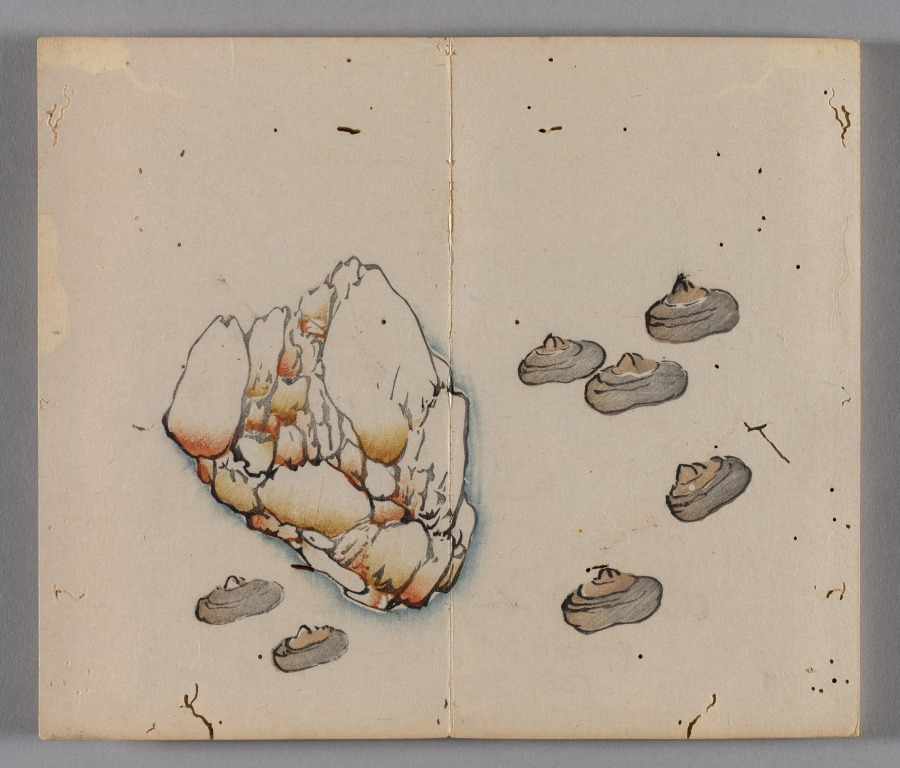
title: Ten Bamboo Studio Painting and Calligraphy Handbook (Shizhuzhai shuhua pu): Fruit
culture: China, Qing dynasty (1644-1911)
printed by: Hu Zhengyan (Chinese, c. 1584–1674)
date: 1633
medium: Woodblock-printed book; ink and colors on paper; first edition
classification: Print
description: Color printing reached a level of perfection in the early 1600s, as seen in this Ten Bamboo Studio Collection of Calligraphy and Painting and the Mustard Seed Garden Manual of Painting (printed 1679 and 1701). The painterly quality, precision in registering (aligning) the woodblocks, and harmonious colors made them the most successful color print editions in Chinese history. Both editions were printed and compiled in Nanjing, spread nationwide, and had a great impact on the arts in Japan and Korea.